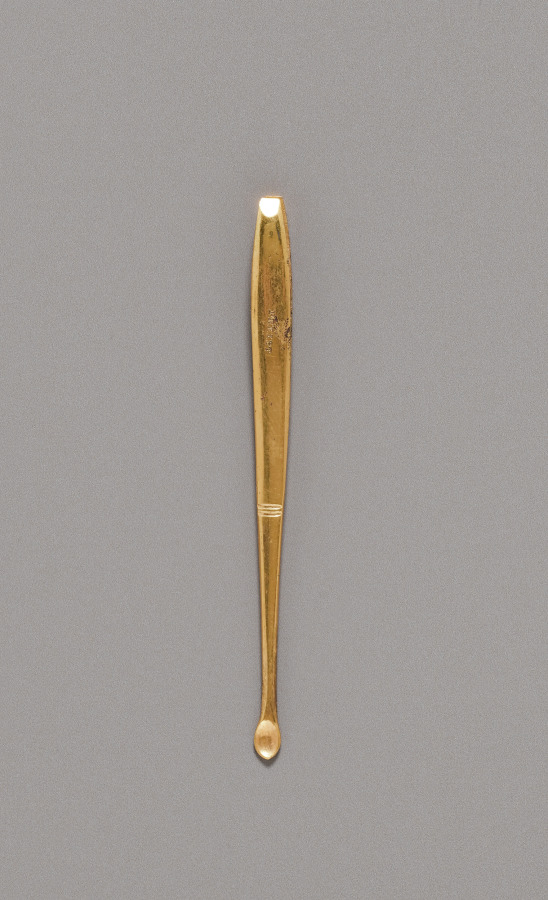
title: Snuff Spoon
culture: England, 18th century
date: c. 1770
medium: gilt metal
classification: Miscellaneous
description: Luxurious personal objects were an essential part of a privileged wardrobe during the 1700s and early 1800s, emphasizing their owner’s refinement and wealth. Especially popular were étuis, small ornamented cases containing miniature sewing, writing, or grooming implements that hung at a woman’s waist from an ornate clasp, known as a chatelaine. Despite its glittering surface, this small expensive set disguised a system based on the labor and suffering of enslaved or indentured people, whether in gold and stone mines or the shop where it was made.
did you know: Stored inside this case are grooming and writing instruments such as a clasp knife, scissors, an ivory tablet, a pencil, a threading needle used for lacing corsets, and an ear scoop.